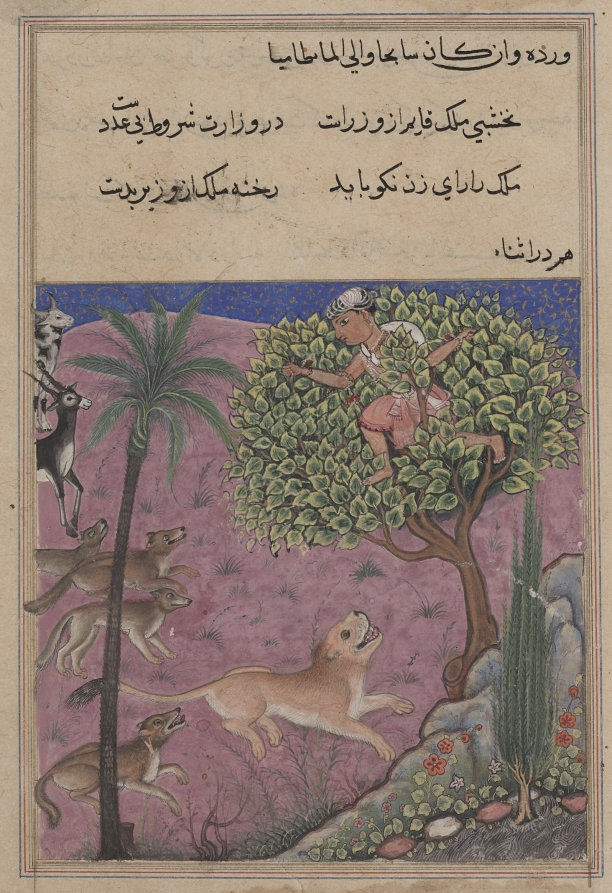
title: The wolf and the jackal, serving as viziers, instigate the lion who pursues the Brahman up a tree, from a Tuti-nama (Tales of a Parrot): Twenty-first Night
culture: Mughal India, court of Akbar (reigned 1556–1605)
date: c. 1560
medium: gum tempera, ink, and gold on paper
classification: Painting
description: The Brahman perches precariously at the top of a tree as the hungry lion waits below surrounded by wolves and jackals. Previously, the lion’s other viziers, the deer and the gazelle, had counseled the lion to treat the Brahman with kindness. They appear again to save the Brahman life.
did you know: The artist has depicted the gazelle and deer as a blackbuck and cow.